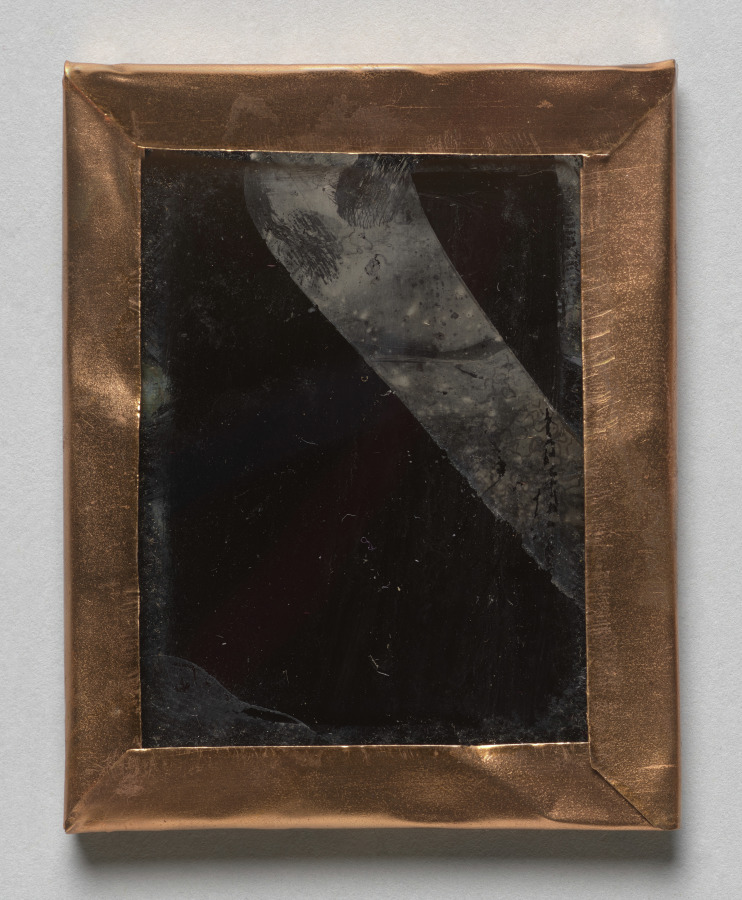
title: Husband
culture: America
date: c. 1860–65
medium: ambrotype, hand-tinted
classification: Photograph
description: You rarely see a smiling portrait from the mid-19th century. Having your photograph taken was a serious and rare endeavor, plus it was difficult to hold any animated expression long enough for the exposure times required by the early processes. Sitters were instructed to find ways to keep from moving, such as clasping their hands. The woman here has taken the photographers’ cautions to an extreme, resulting in a tense and unflattering portrait.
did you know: In the early decades of photography, many people did not know how to pose for the camera.